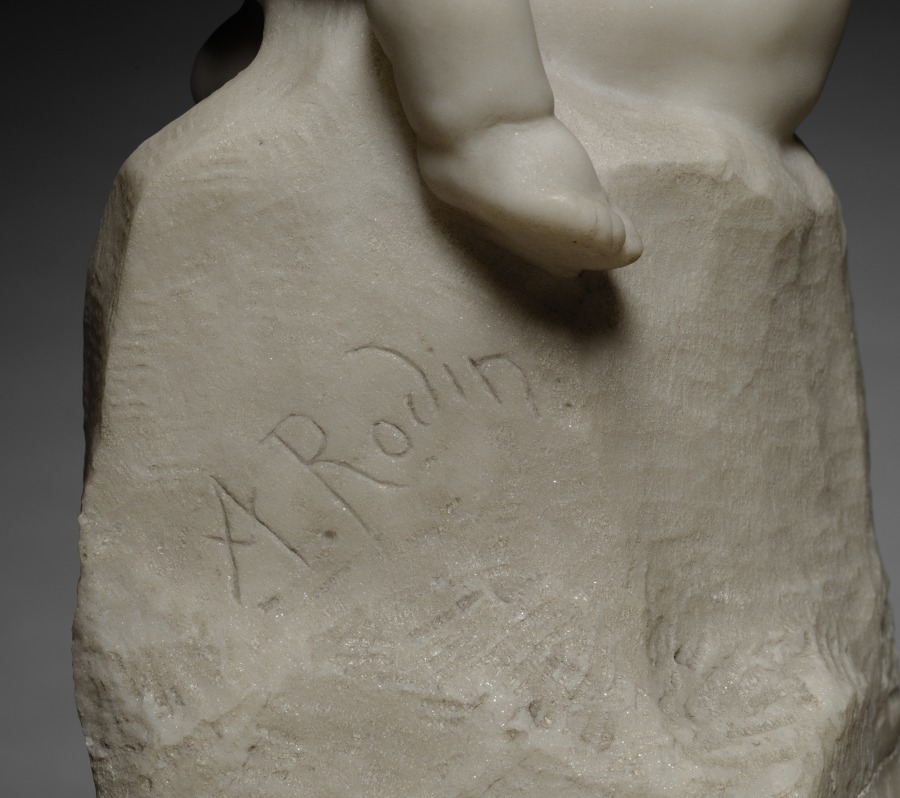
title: Little Brother and Sister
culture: France, early 20th Century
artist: Auguste Rodin (French, 1840–1917)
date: 1916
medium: marble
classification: Sculpture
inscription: Signed on base beneath figures: "A. Rodin"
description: Rodin spent years exploring new ways of representing the human emotions of love and affection experienced at different stages of life. The bodies and gestures of the children here suggest an innocent foreshadowing of the mature couple in the artist’s celebrated sculpture The Kiss of 1882. Both works feature a strong tactile contrast between the rough-hewn lower area and the smooth surfaces of the nude body above. Upwardly spiraling forms, combined with shifting areas of light and shadow, infuse the sculpture with dynamic energy.